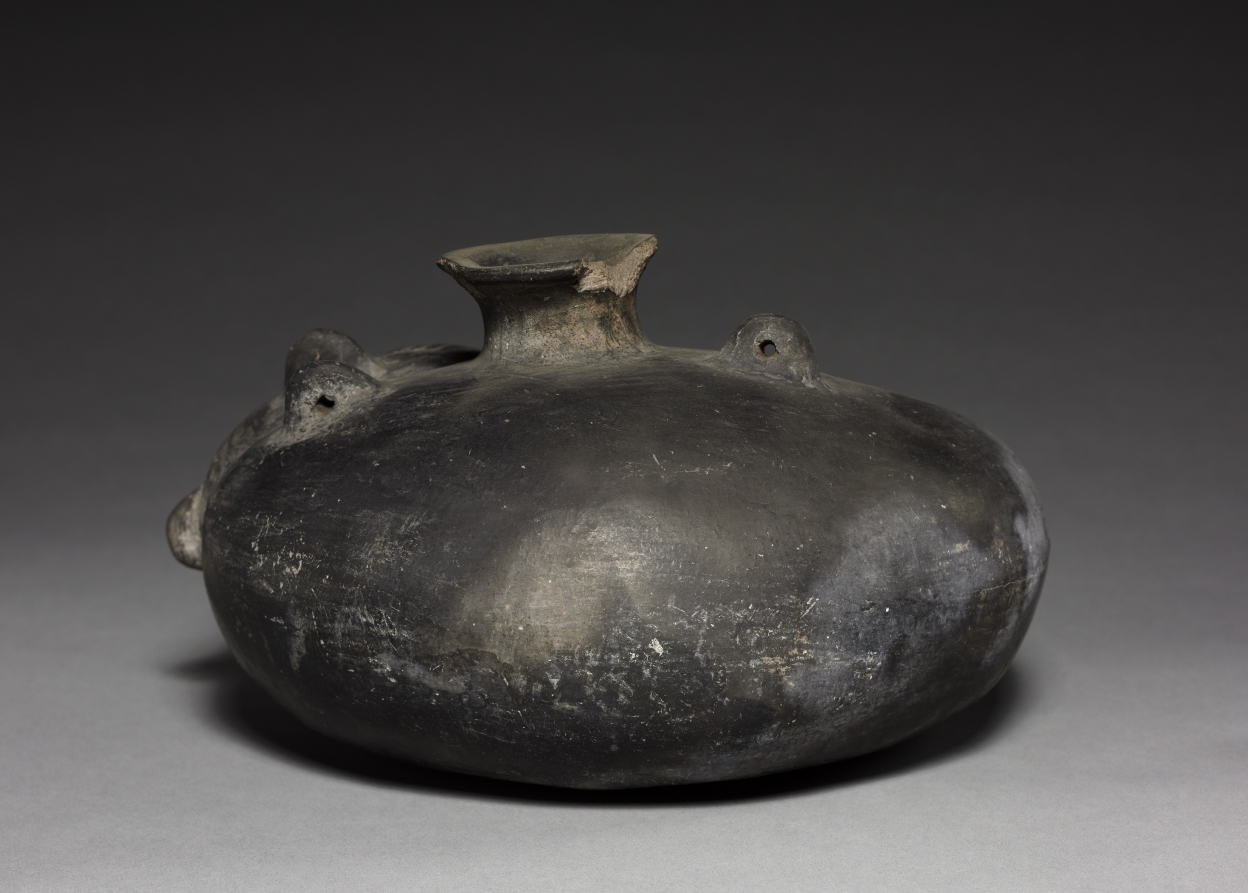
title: Bottle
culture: Peru, Chimú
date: 1300–1400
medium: pottery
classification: Ceramic